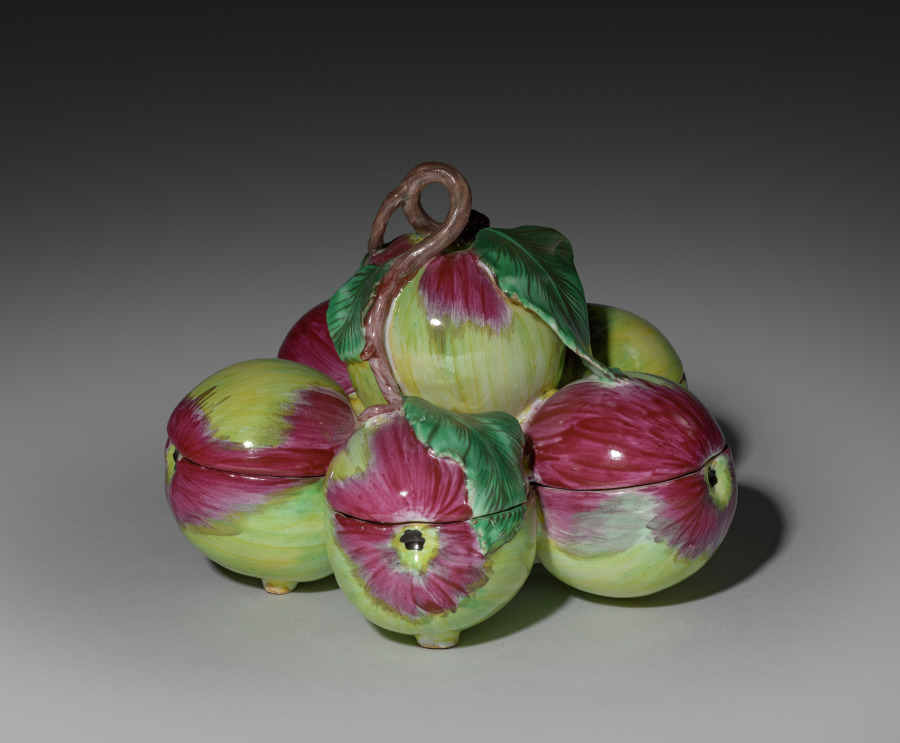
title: Covered Box in the Form of Apples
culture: France, 18th century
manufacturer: Sceaux Factory (French, active 1748–66)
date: c. 1760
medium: Tin- glazed earthenware (faience) wth enamel decoration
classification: Ceramic